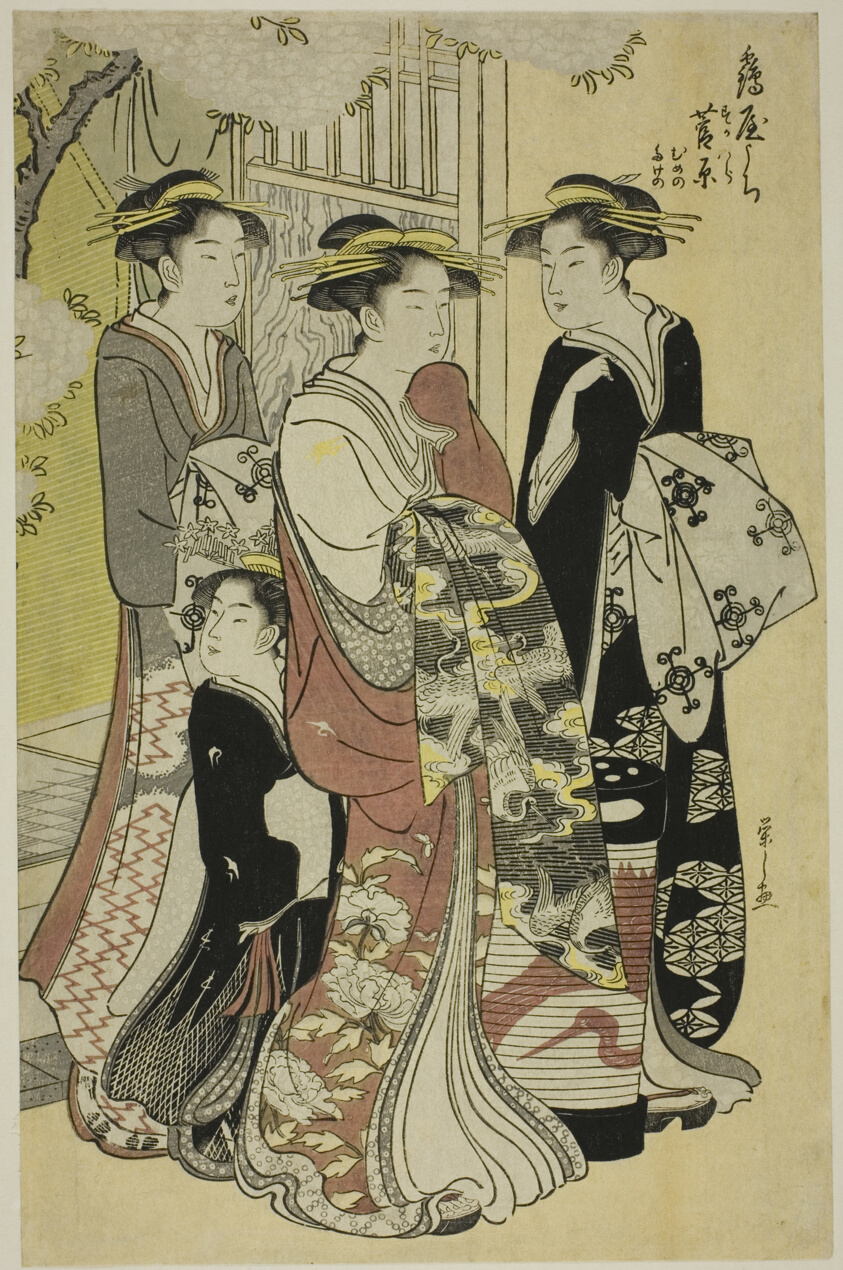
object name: Print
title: Sugawara of the Tsuruya with Attendants Mumeno and Takeno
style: Japanese (culture or style)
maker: Chobunsai Eishi; Japanese, 1756-1829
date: c. 1787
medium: Color woodblock print; oban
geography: Japan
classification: woodblock print; print; asian art